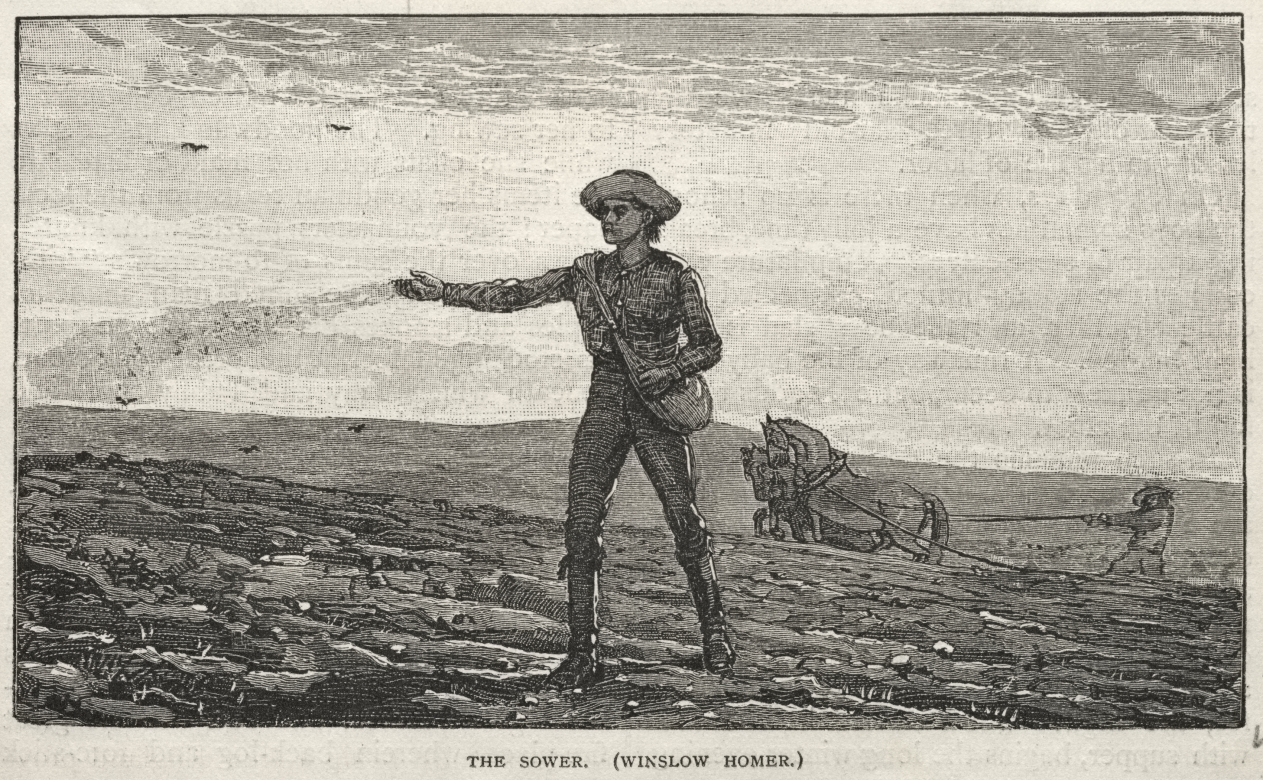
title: The Sower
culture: America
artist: Winslow Homer (American, 1836–1910)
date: 1878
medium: wood engraving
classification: Print